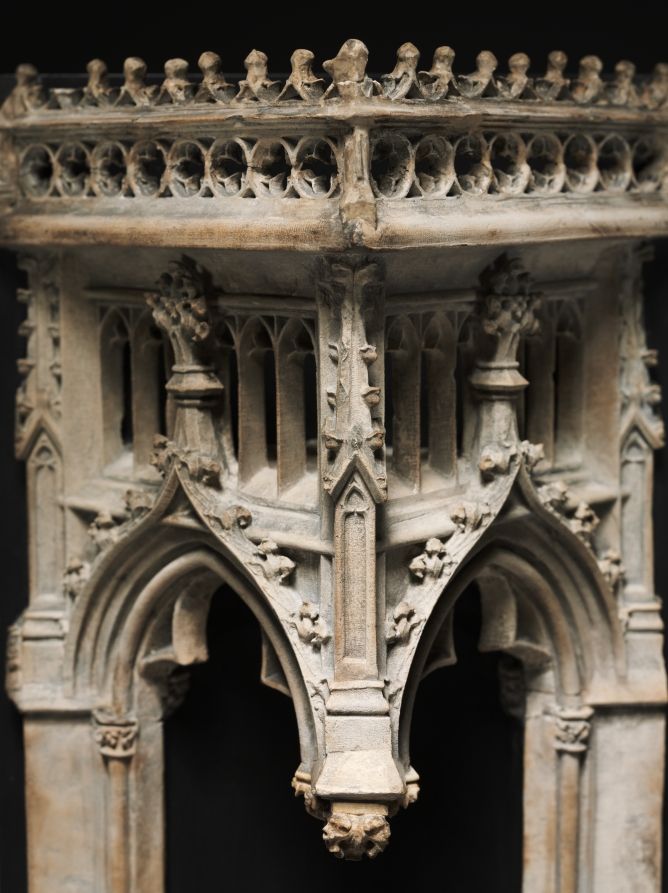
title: Architectural Canopy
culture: France, Burgundy, 15th century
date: c. 1450–1475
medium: limestone from Tonnerre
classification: Sculpture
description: Part of a pair of canopies, both must have originally belonged to an architectural ensemble like a tomb or a choir screen set within a church. Strikingly carved as architecture in miniature, they contain all of the elements of Flamboyant Gothic architecture of the late 15th century, so named after its flame-like stone tracery with wavy ornaments. This style of architecture is characterized by its intricacy of detailing and virtuosity of workmanship. Small sculptures may have originally occupied the space beneath the canopies.